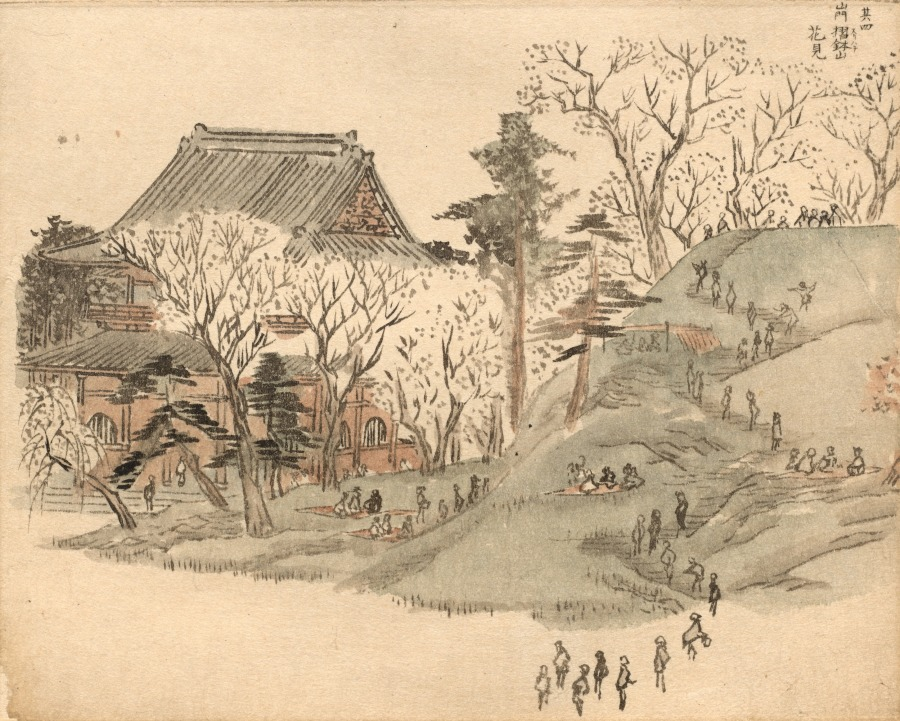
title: Cherry Blossom Viewing at the Temple on Mt. Suribachi after a Design in Volume 5 of Picture Book of the Souvenirs of Edo (Ehon Edo miyage)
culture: Japan, Edo period (1615–1868)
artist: after Utagawa Hiroshige (Japanese, 1797–1858)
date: after 1850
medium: watercolor on paper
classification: Drawing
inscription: Titled in upper right.